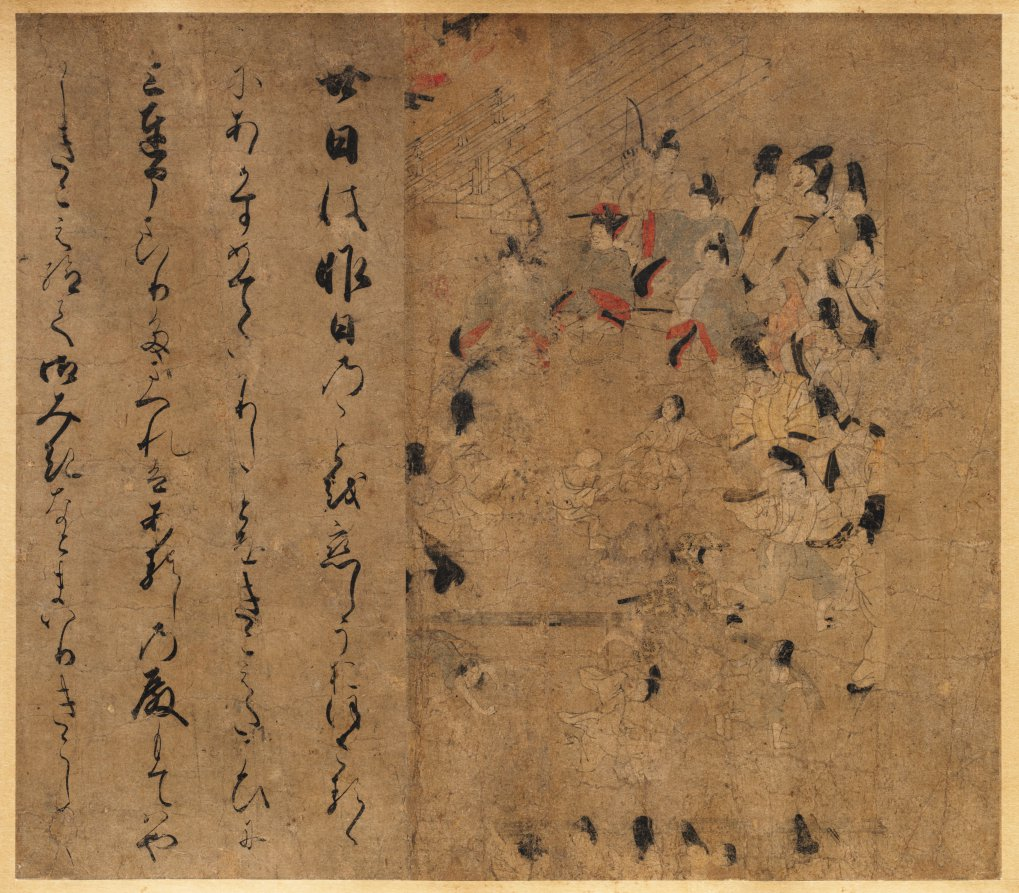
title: The Emperor's Attendance at the Horse Race: Episode from the Tale of Eiga (Eiga Monogatari)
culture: Japan, Kamakura period (1185–1333)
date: c. 1200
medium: handscroll; ink and color on paper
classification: Painting